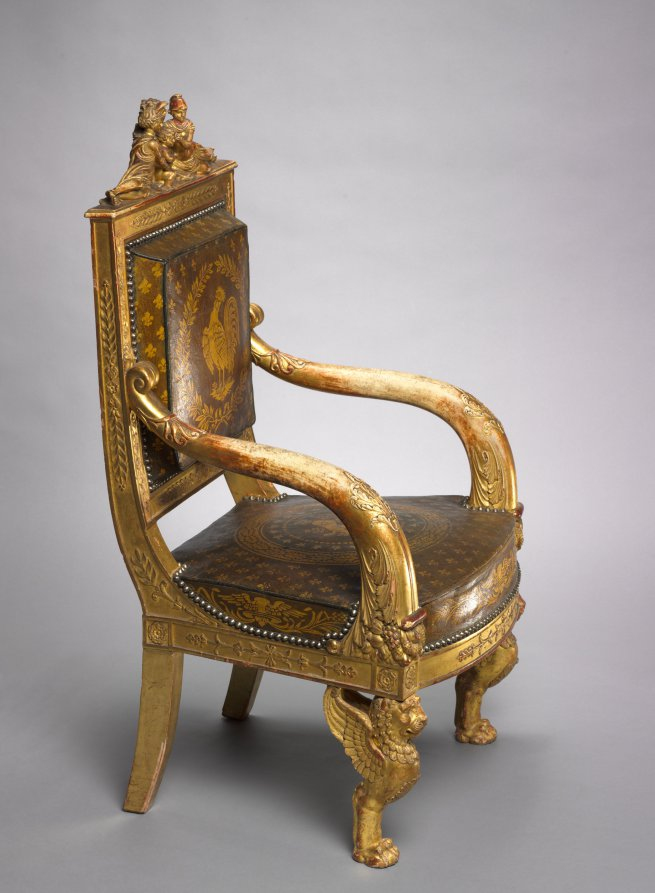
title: Child's Throne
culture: France, Paris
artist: Pierre-Marie Balny le Jeune (French, 1832)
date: 1822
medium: carved and gilded wood, leather upholstery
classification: Furniture and woodwork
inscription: inscribed with stencils inside back rail: BLONDEL TAPISSIER/RUE ST. ANTOINE N 72 1822 inscribed in ink lower edge back rail: 12 JANVIER 18[22?]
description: This chair was made for the young, presumed successor to the French throne who ruled briefly as Henri V in 1830, the last of the direct Bourbon line. He is depicted at the center of the top rail protected by female figures representing France and Minerva, the Roman goddess of wisdom. Fleurs-de-lis and the Gallic rooster, symbols of French royalty and the French people, decorate the upholstery.